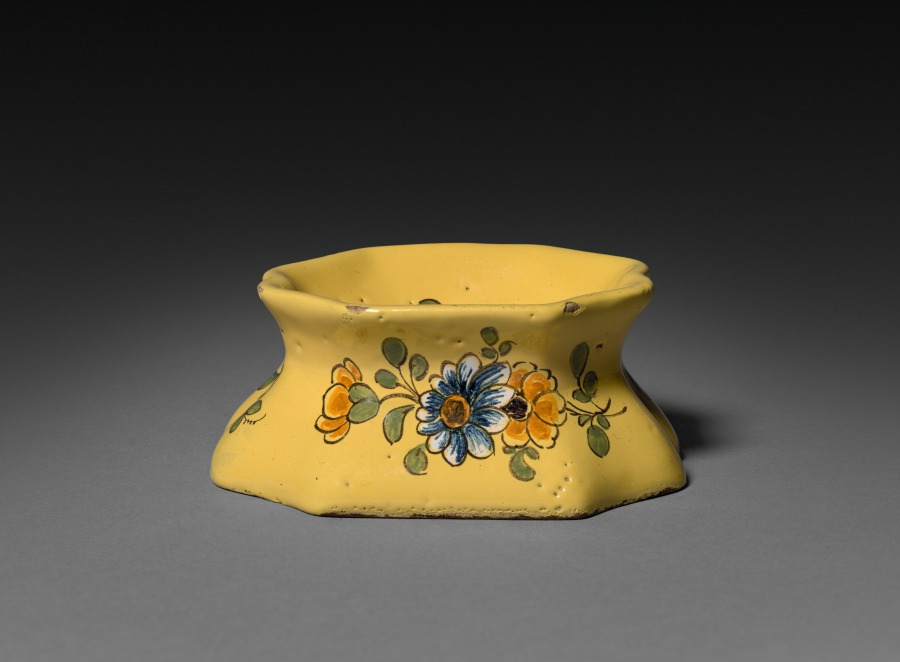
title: Salt Dish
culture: France, Moustiers, 18th century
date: c. 1775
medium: faience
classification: Ceramic